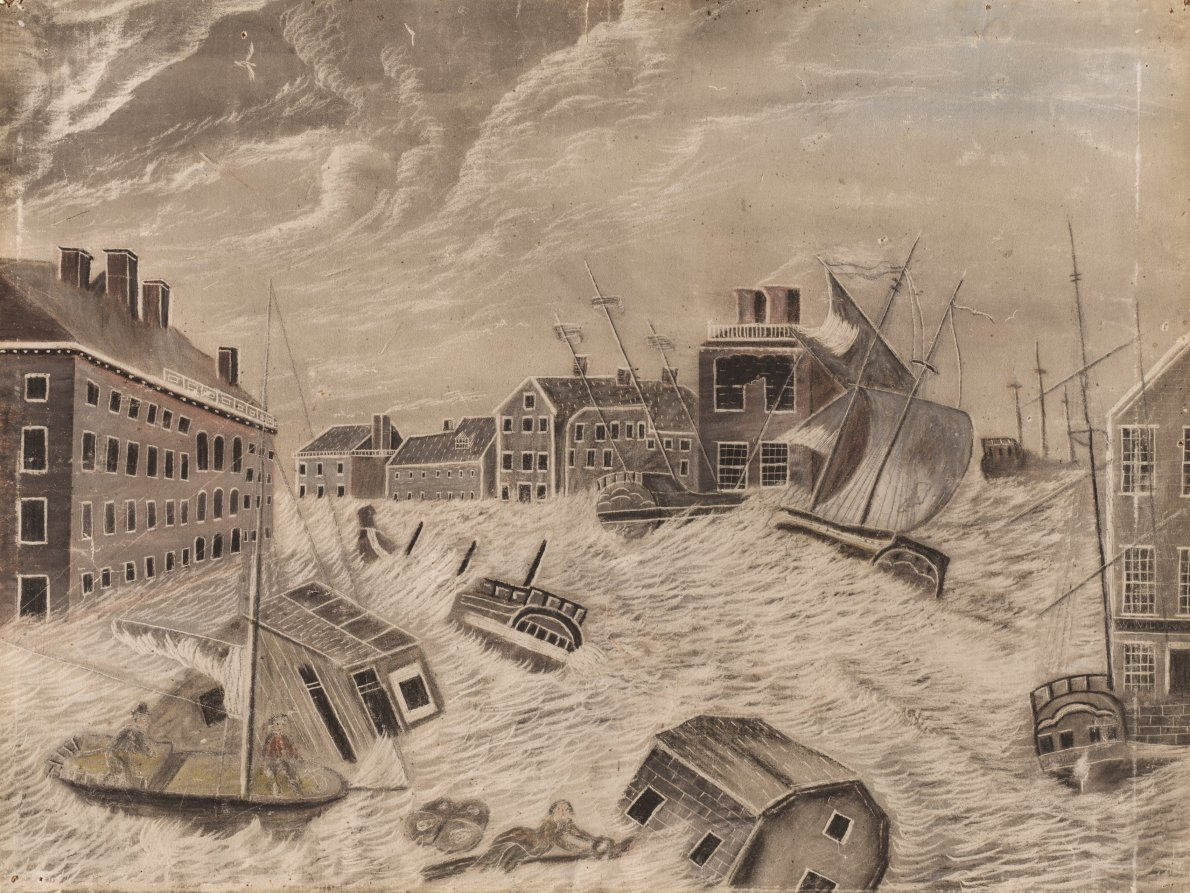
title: Market Square, Providence, Rhode Island, During the Great September Gale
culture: America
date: 1815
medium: black crayon and pastel, with graphite and stylus; scraped and incised in places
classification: Drawing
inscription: VERSO, upper left, in graphite: 986/4 [sideways]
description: This anonymous drawing combines a meticulous depiction of actual buildings with a wonderfully abstract rendering of waves and weather effects. The artist was led to stretch his artistic abilities because of a bizarre and memorable event: a hurricane that washed ships into the streets of downtown Providence in September of 1815.